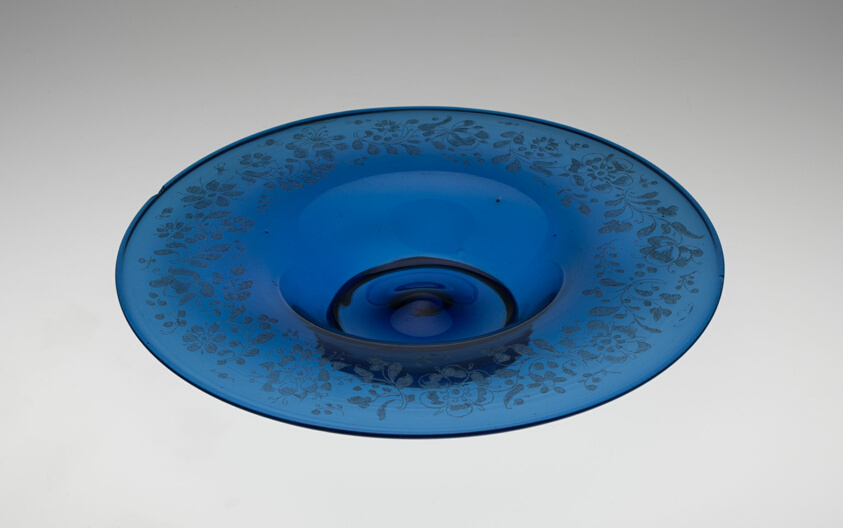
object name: Glass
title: Plate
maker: Germany or Netherlands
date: 1600/25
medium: Blue glass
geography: Germany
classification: plate (general, dish); glass; dish (vessel); european decorative arts